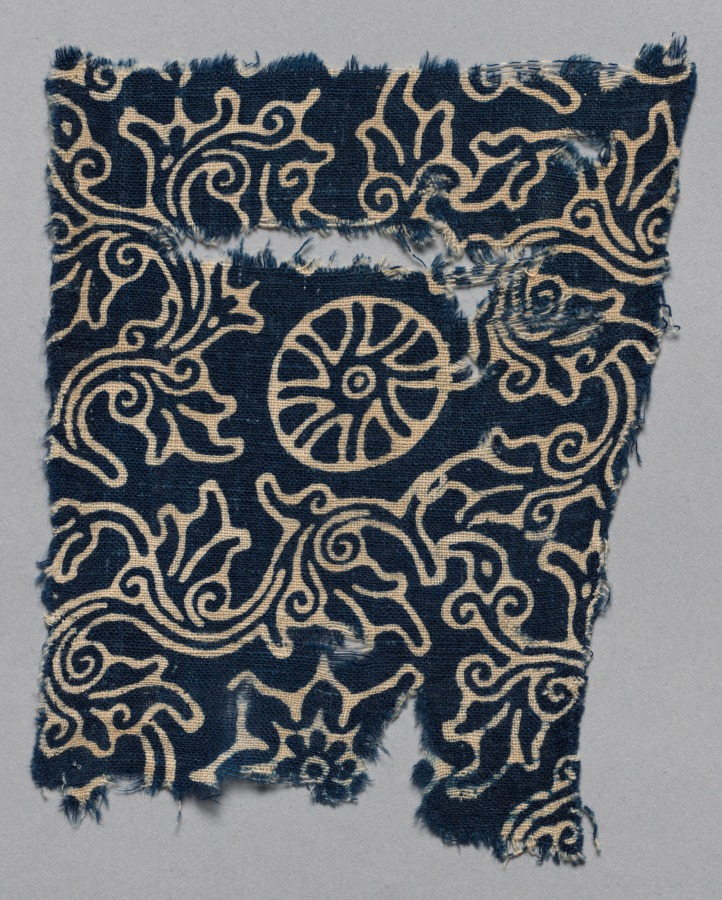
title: Fragment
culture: India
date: 1100s–1300s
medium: plain cloth, resist dyed; cotton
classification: Textile